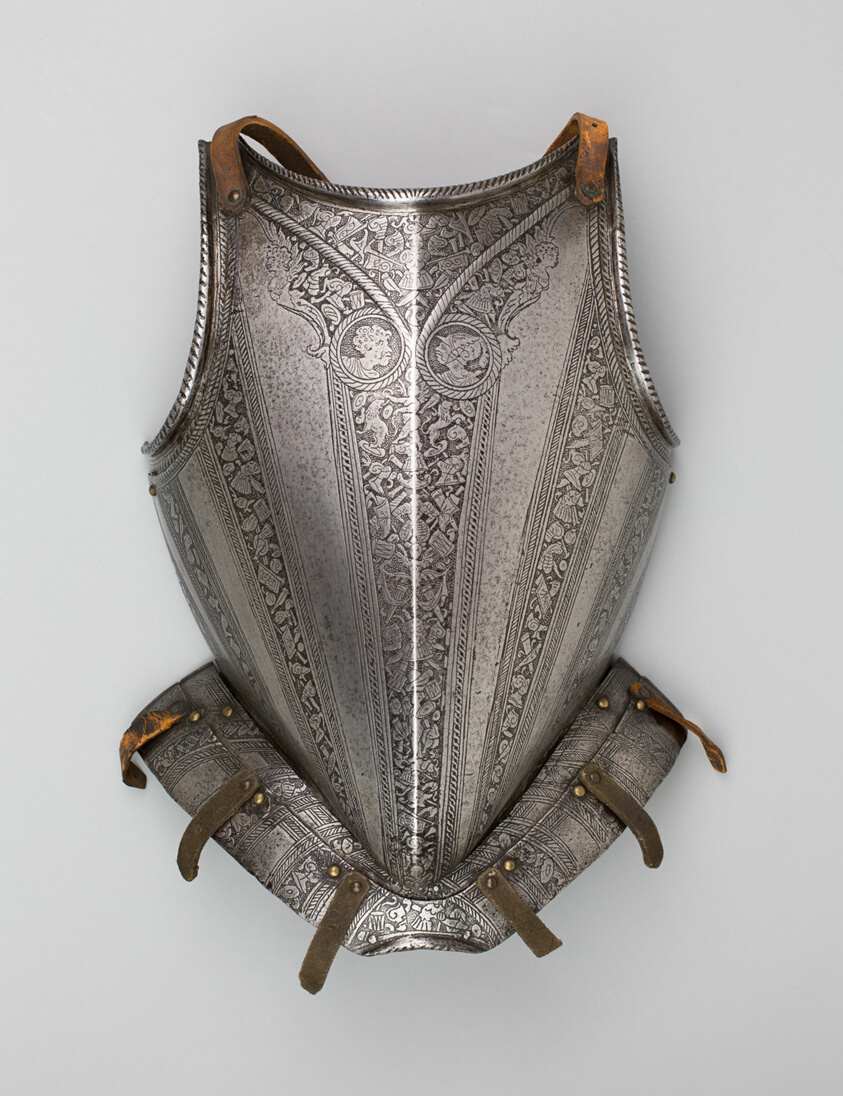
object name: Armor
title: Breastplate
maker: North Italian, probably Milan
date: 1570-80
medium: Steel and leather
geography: Milan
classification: suit-element; armor; arms and armor